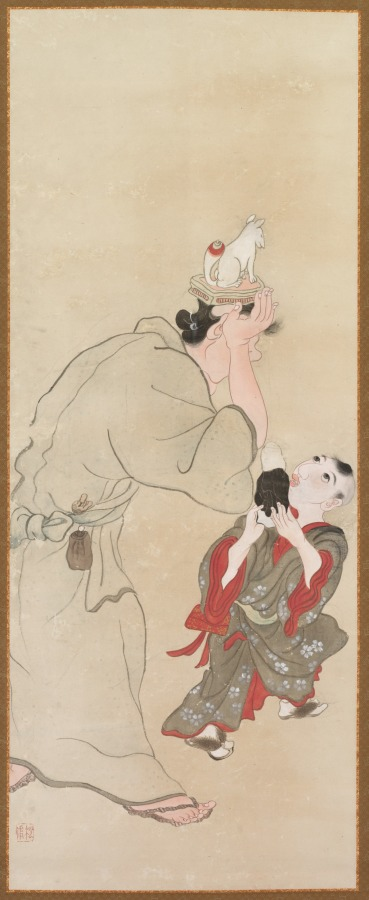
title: Genre Figures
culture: Japan, Edo period (1615–1868)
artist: Takebe Sōchō (Japanese, 1760–1814)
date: c. 1816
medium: hanging scroll; ink and color on paper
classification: Painting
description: Though rarely mentioned in official histories, Socho was an accomplished painter whose talent is readily apparent to the modern eye. For his compositions he chose traditional Japanese stories or everyday events. This painting belongs to a triptych (set of three) that was recently converted from folding screen panels to hanging scrolls.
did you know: The adult in this painting transports a small sculpted image of the fox deity Inari atop his head.